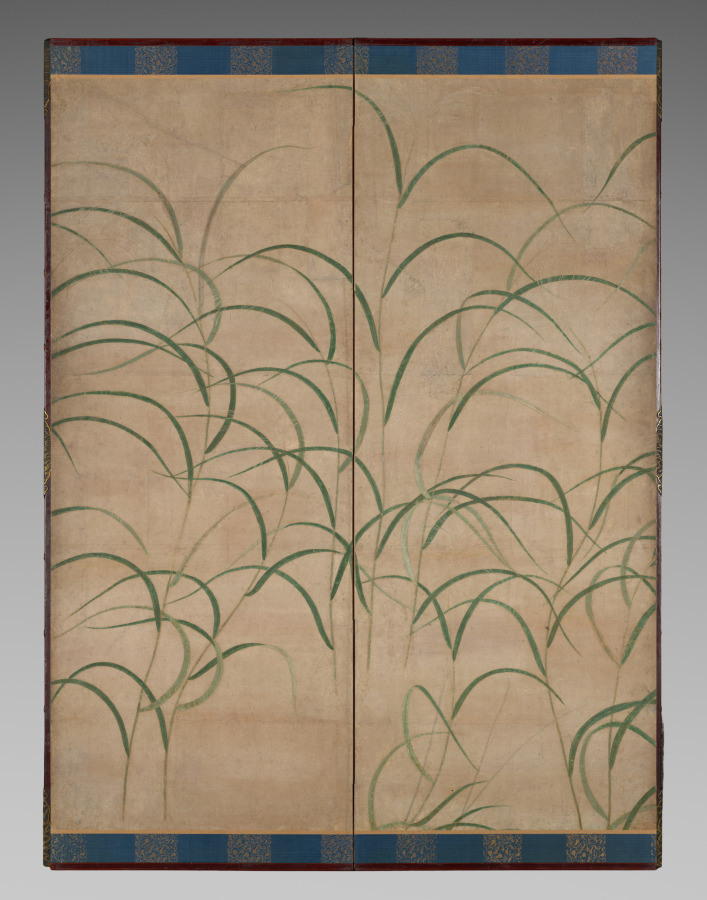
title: Susuki Grass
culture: Japan, Muromachi period (1392–1573)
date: c. 1525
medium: One of a pair of six-panel folding screens; ink, color, and gold on paper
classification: Painting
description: Susuki grass has a seasonal association with autumn in the Japanese visual and literary tradition. It is one of the “Seven Flowers of Autumn,” along with bush clover, arrowroot, pink, patrinia, mistflower, and bellflower. This composition immerses the beholder in a field of grasses and golden bands of mist. The design may have served as a backdrop for poems brushed in ink on decorated papers and attached to the surface of the screens, a practice with a long tradition in Japan.